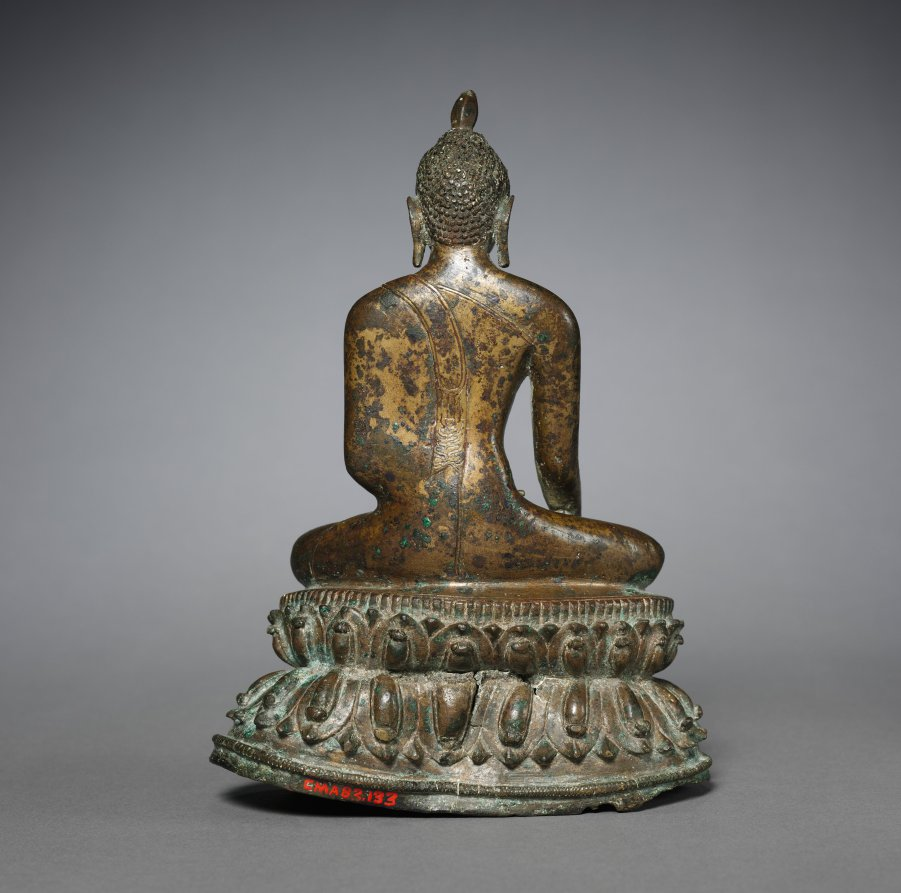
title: Sakyamuni Buddha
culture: Burma, Pagan style, 12th century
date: 1100s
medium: bronze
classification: Sculpture